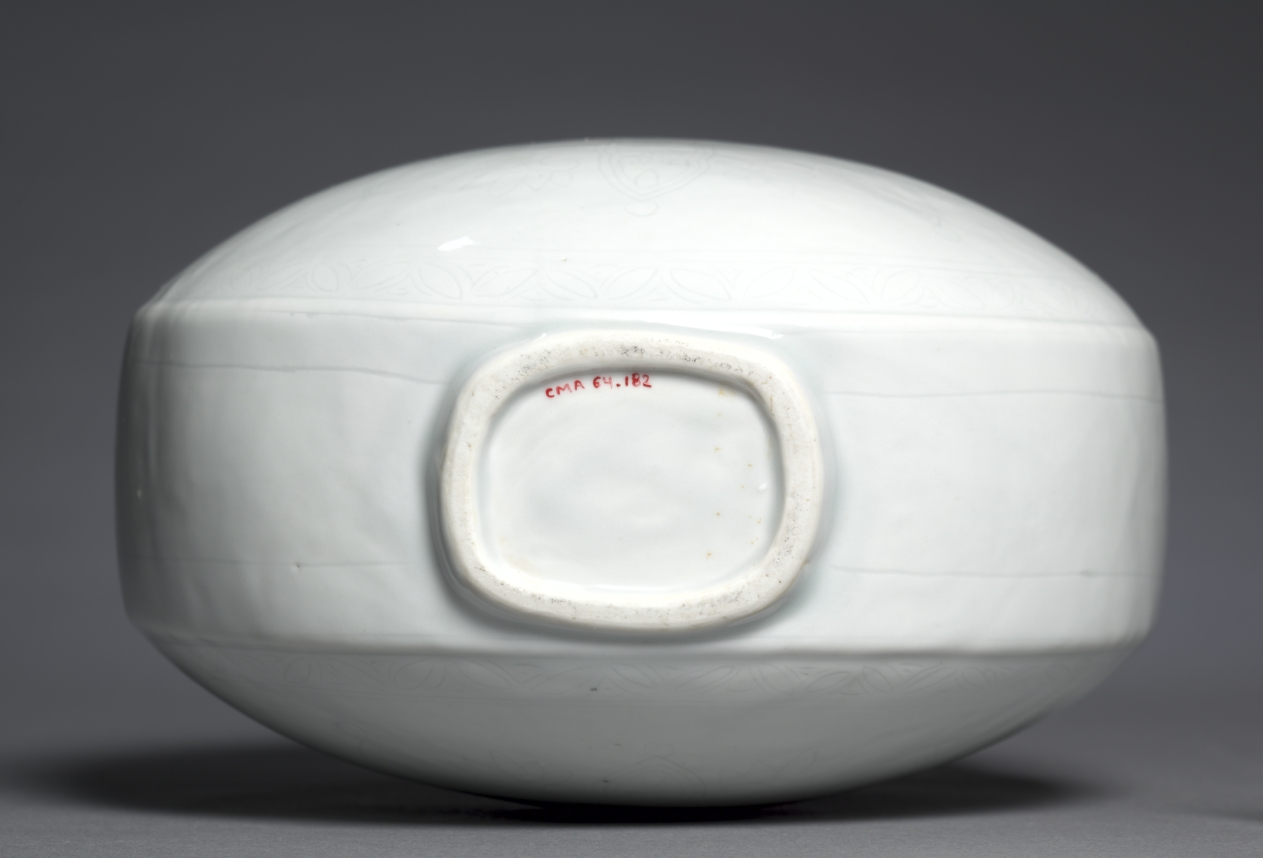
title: Gourd Flask with Floral Medallion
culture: China, Jiangxi province, Jingdezhen, Ming dynasty (1368-1644), Yongle period (1403-24)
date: 1403–24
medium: porcelain with incised decoration and white glaze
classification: Ceramic